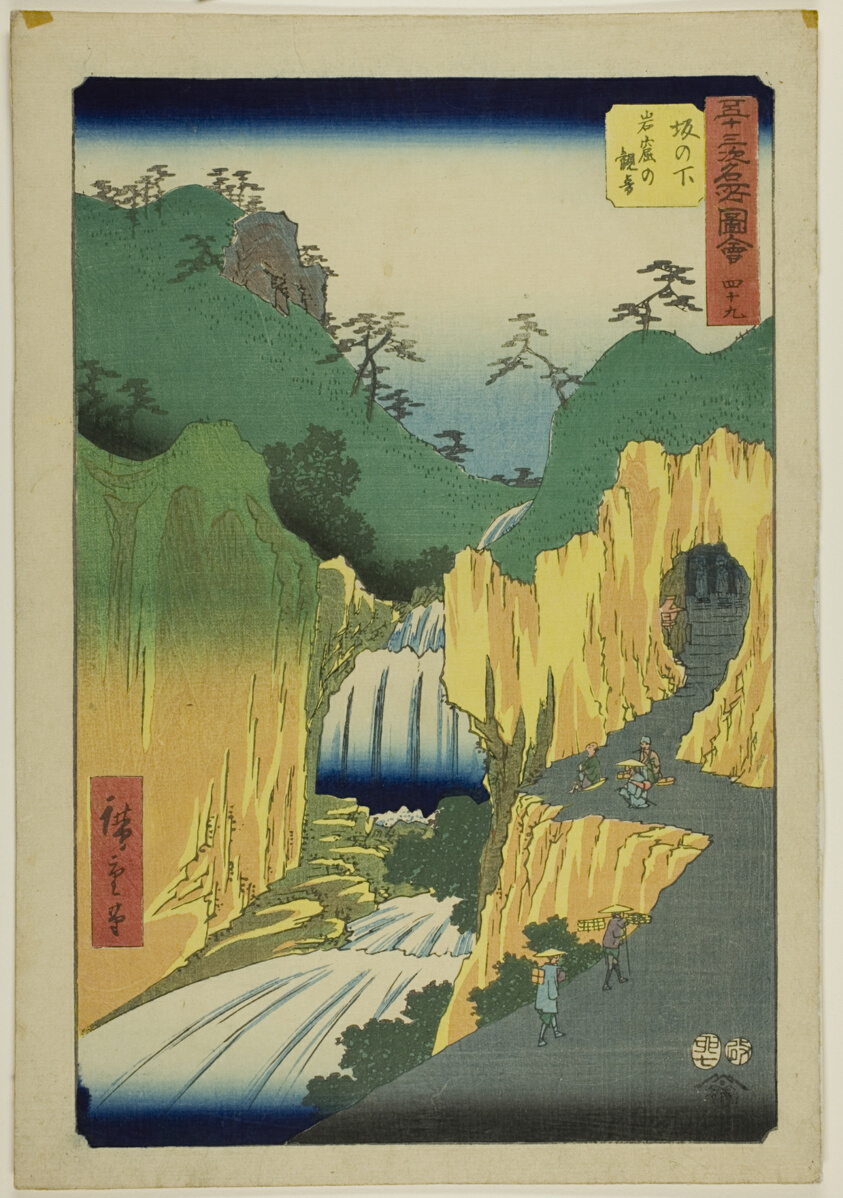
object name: Print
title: Sakanoshita: Kannon in the Cave (Sakanoshita, Gankutsu no Kannon), no. 49 from the series "Famous Sights of the Fifty-three Stations (Gojusan tsugi meisho zue)," also known as the Vertical Tokaido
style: Japanese (culture or style)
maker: Utagawa Hiroshige 歌川 広重; Japanese, 1797–1858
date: 1855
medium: Color woodblock print; oban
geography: Japan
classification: woodblock print; print